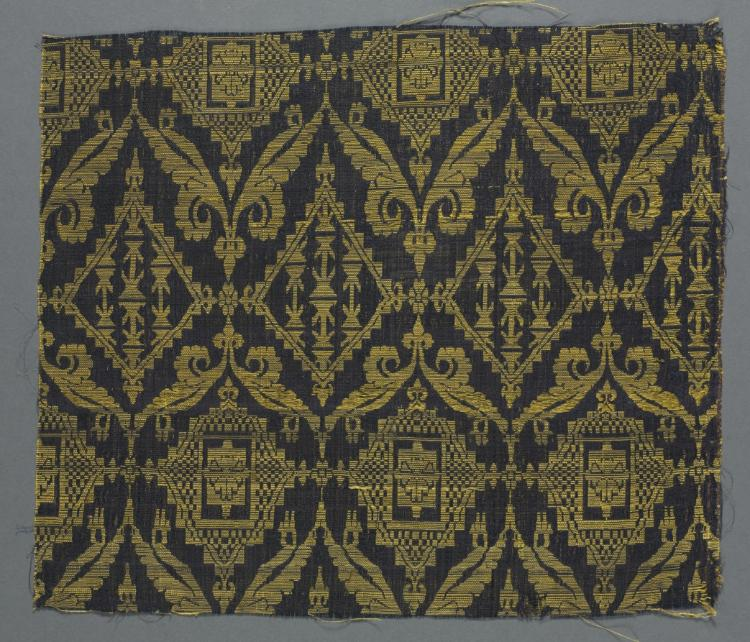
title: Silk Fragment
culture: Syria or Egypt, Mamluk Dynasty (1250–1517)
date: 1400s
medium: lampas weave, silk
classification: Textile